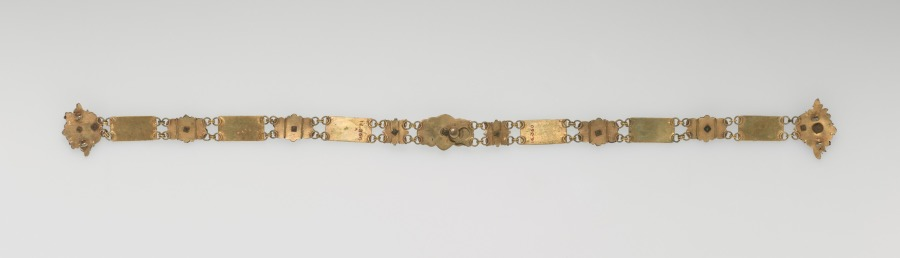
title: Belt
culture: Netherlands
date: early 1700s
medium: enamel on copper with gilt metal mounts and cloisonné medallions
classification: Enamel